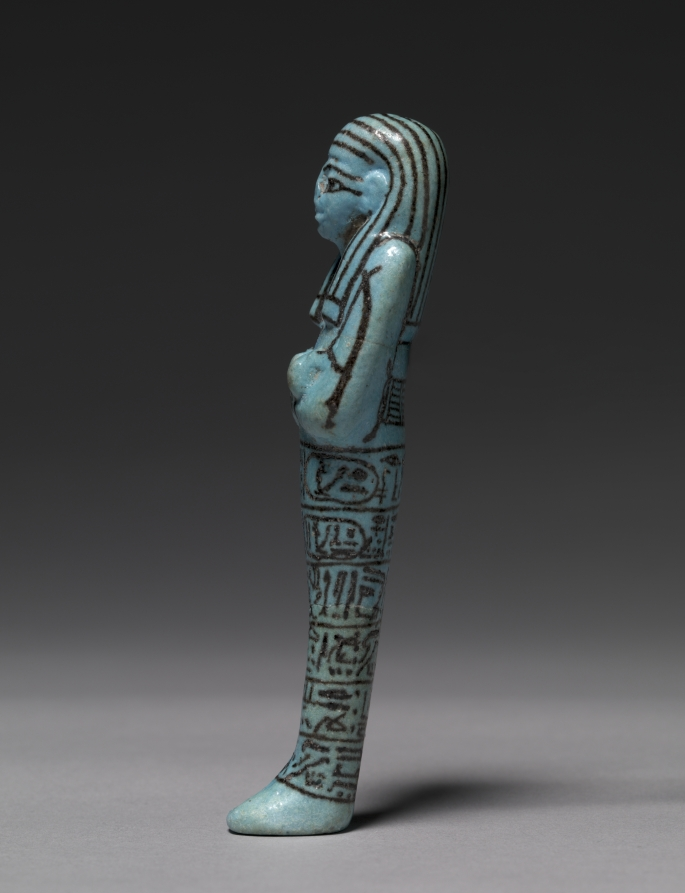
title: Shawabty of Seti I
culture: Egypt, Thebes, New Kingdom, Dynasty 19, reign of Seti 1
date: c. 1294–1279 BCE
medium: medium blue faience with black decoration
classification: Funerary Equipment